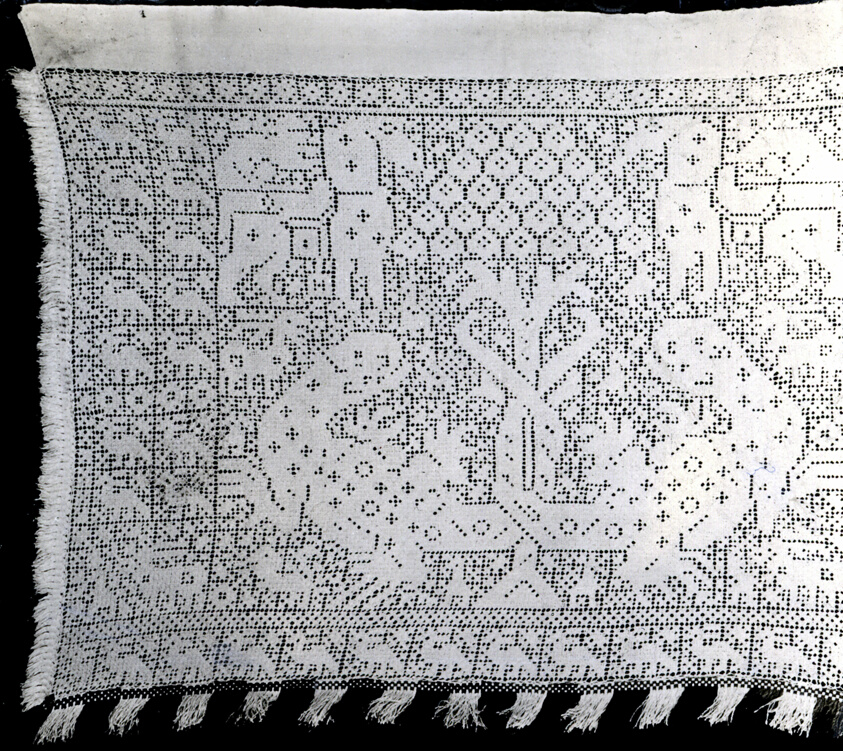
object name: Religious/Ritual Object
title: Altar Frontal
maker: Spain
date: 19th century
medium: Square crosswork; plain material; plain fringe; darned filet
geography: Spain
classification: textile; needlework (visual works); altar; ritual objects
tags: altar